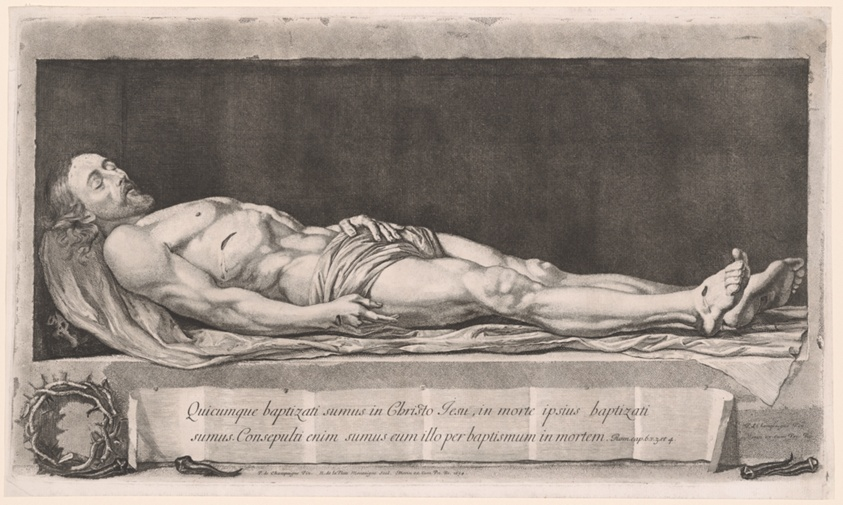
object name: Print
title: The Dead Christ Lying in the Sepulchre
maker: Nicolas de Plattemontagne (French, 1631-1706); after Philippe de Champaigne (French, 1602-1674)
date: 1654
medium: Engraving and etching in black on ivory laid paper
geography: France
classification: print; prints and drawing; engraving; etching; paper